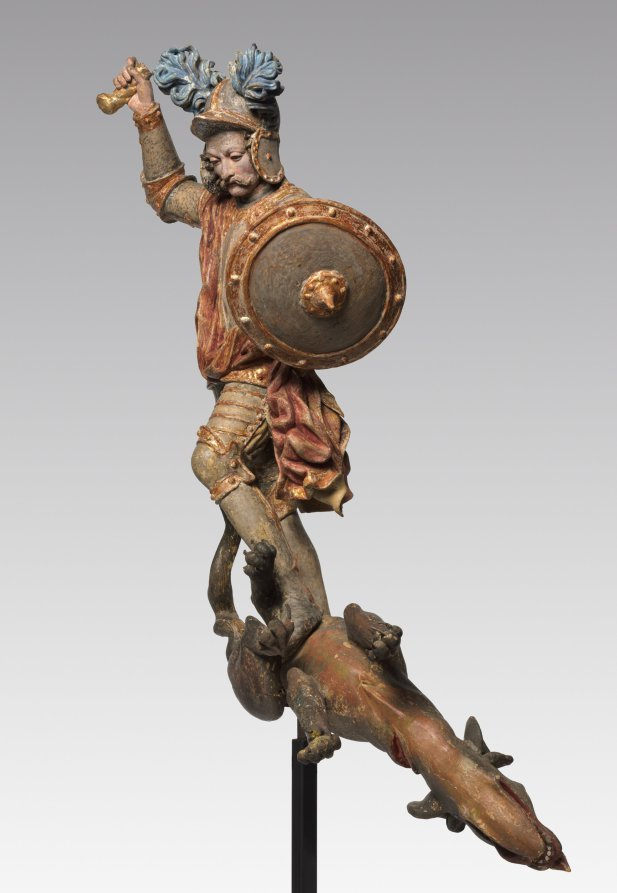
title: Saint George and the Dragon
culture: South Germany or Austria, late 17th century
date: late 1600s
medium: painted and gilded wood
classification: Sculpture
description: Saint George, a Roman soldier martyred for his Christian faith, is best known for slaying a fearsome dragon that terrorized the city of Silene, in Libya. George offered to kill the monster if residents of the city convert to Christianity. Here, George stands triumphantly over the dragon, writhing as it dies. The artist deliberately incorporated features intended to make his figure seem more familiar: the dragon seems more canine than reptilian, while George wears armor from the recent past and bears almost portrait-like facial features.